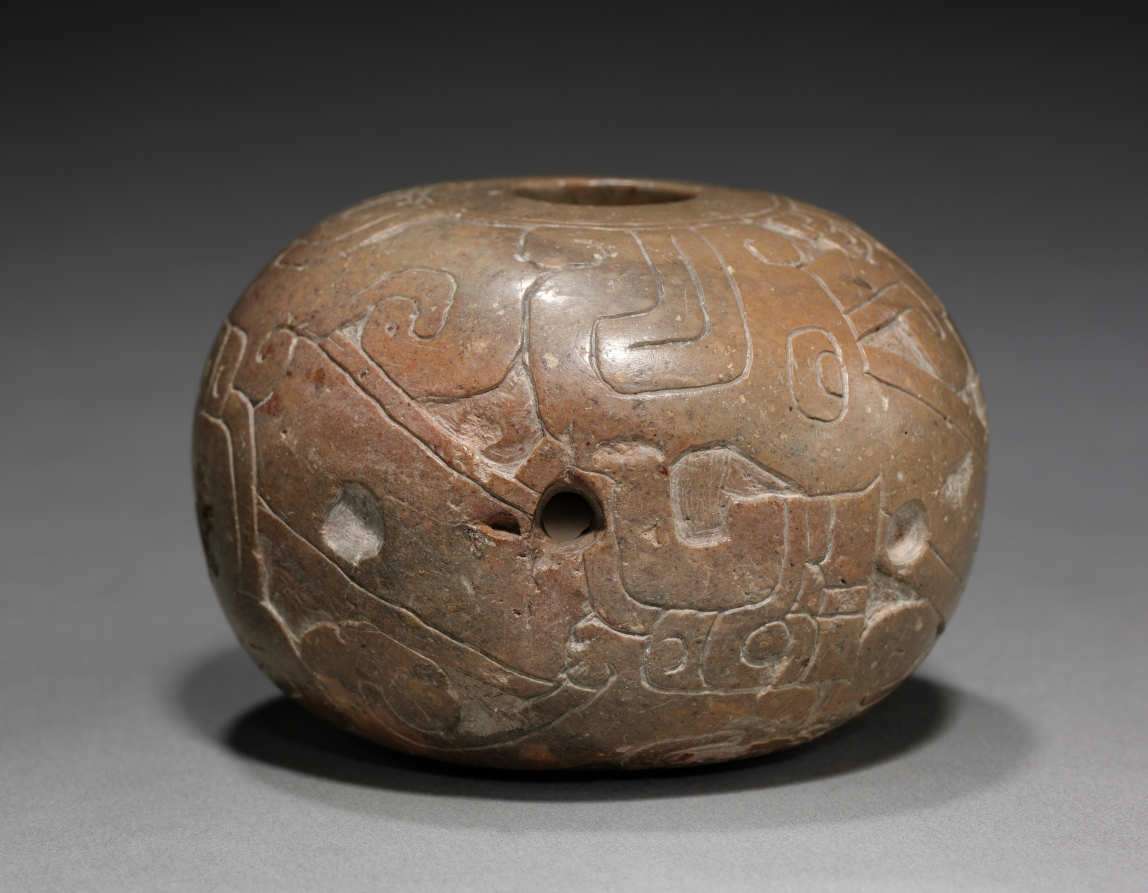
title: Container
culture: Peru, North Coast, Cupisnique style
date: 1200–200 BCE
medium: steatite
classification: Stone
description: While Chavín held sway in the highlands, coastal artists produced many objects in non-Chavín styles. Such is the case with these small, finely-carved, stone containers, which were part of north coast ritual paraphernalia, though their specific use in unclear. Both bear complex designs based on fanged heads in profile that lack lower jaws.